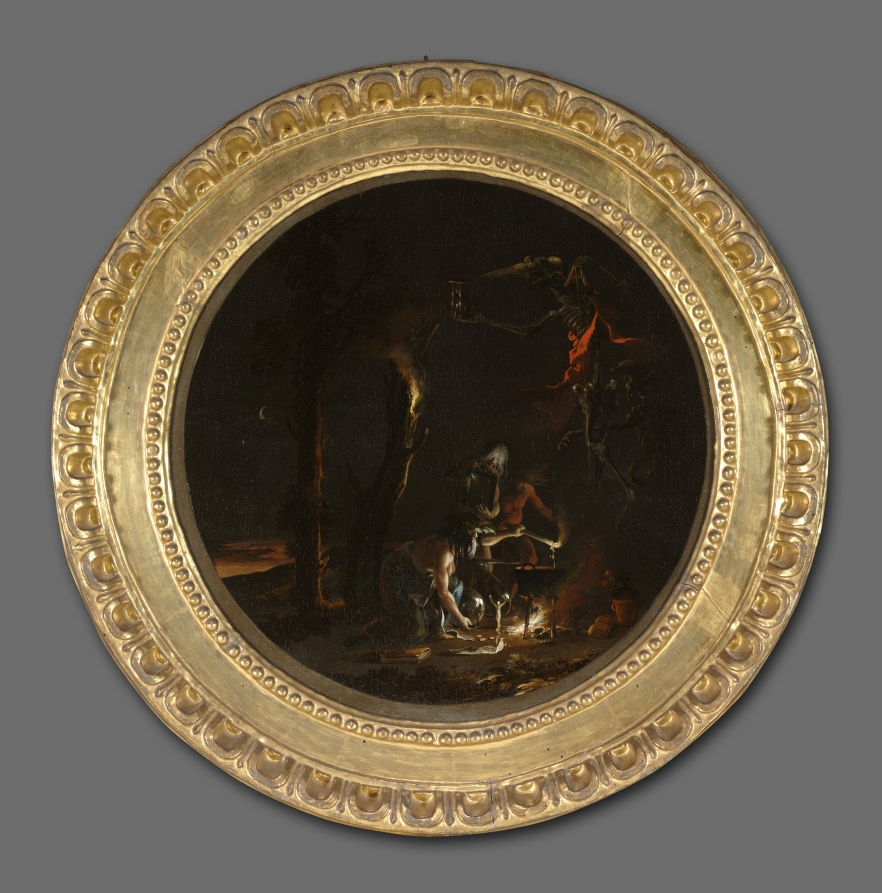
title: Scenes of Witchcraft: Evening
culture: Italy, 17th century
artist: Salvator Rosa (Italian, 1615–1673)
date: c. 1645–49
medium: oil on canvas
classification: Painting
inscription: Signed: "SR [monogram]"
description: At dusk, Rosa's hags gather around a cauldron. Above their incantations soars a conjured skeleton holding an hourglass symbolizing the brevity of life. In its left hand, the demonic creature holds a capital letter A from which extends a plumb line; as ancient signs of the moon and judgment, this strange combination of symbols embodies the nocturnal judgment the witches are doling out below. Though more rare in paint, the detailed portrayal of witches at their spells enjoyed a long literary tradition. The wax effigy alludes to classical literature by Virgil and Horace that described love magic. Poets in the 1500s and 1600s continued the tradition, writing verse about witches concocting potions and performing love spells. In Rosa's own poem "La Strega (The Witch)," the jilted Phyllis vows to take revenge on her feeble lover, listing the ingredients for her black magic: "ground powders, mystic gems, snakes and owls, stinking blood. . . ." Painting was considered "mute poetry" in the 1600s, and Rosa often explored the same themes in his written and painted art—a clever way to gain fame as a unique intellect.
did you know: The artist chose the painting's shape to reference the foundational role of the circle in practicing magic.